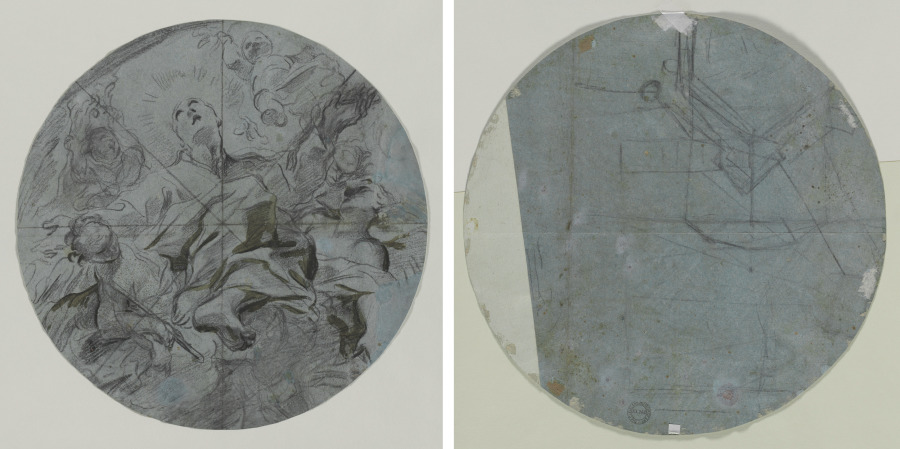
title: Apotheosis of a Saint (recto); Architectural Sketch(?) (verso)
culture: Italy, 17th century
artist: Giovanni Battista Benaschi (Italian, 1636–1688)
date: second half 17th century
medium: black chalk with brush and brown wash; divided into eighths with ruled black chalk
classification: Drawing